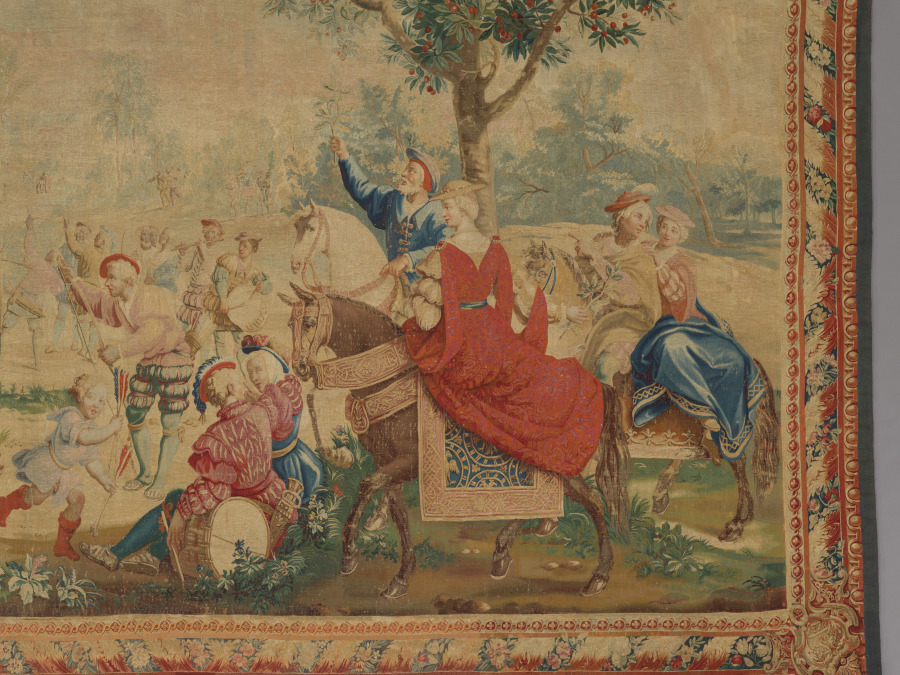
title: Month of May: Scene of May Day Festival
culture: France, 18th century, Period of Louis XV (1723-1774)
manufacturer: Gobelins Manufactory (France, Paris, est. 1662)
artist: Michel Audran (French, 1701–1771)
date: 1723–1774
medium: tapestry weave: linen warp, wool and silk wefts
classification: Tapestry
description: Seated spectators and splendidly clothed ladies and gentlemen on horseback watch May Day festivities in this tapestry. In the middle distance, archers prepare to shoot at a bush and bird placed atop a maypole, while more spectators congregate in the receding landscape. A border of rolled acanthus leaves and flower garlands frames the scene. This scene is one of twelve so-called Months of Lucas tapestries, each depicting activities that coincide with a month of the year. The original “Months of Lucas” was a sixteenth-century Flemish tapestry set that was owned by the French monarchy and mistakenly attributed to Lucas van Leyden during the 1600s. To this day, they continue to be known as the “Months of Lucas.” This original set was burned in 1797 so their gold and silver metal threads could be used to replenish the depleted French coffers. Beginning in the 1600s, the popular Months of Lucas were reproduced in several different versions under various masters at the Gobelins Manufactory in Paris, the famous royal production center for French tapestries since Louis XIV (1638–1715). The lower right hand corner of this tapestry bears the signature of Michel Audran (1701–1771), director of the Gobelins high-warp loom workshop from 1732–71, who produced this tapestry for a private patron in addition to the other royal commissions of the set.